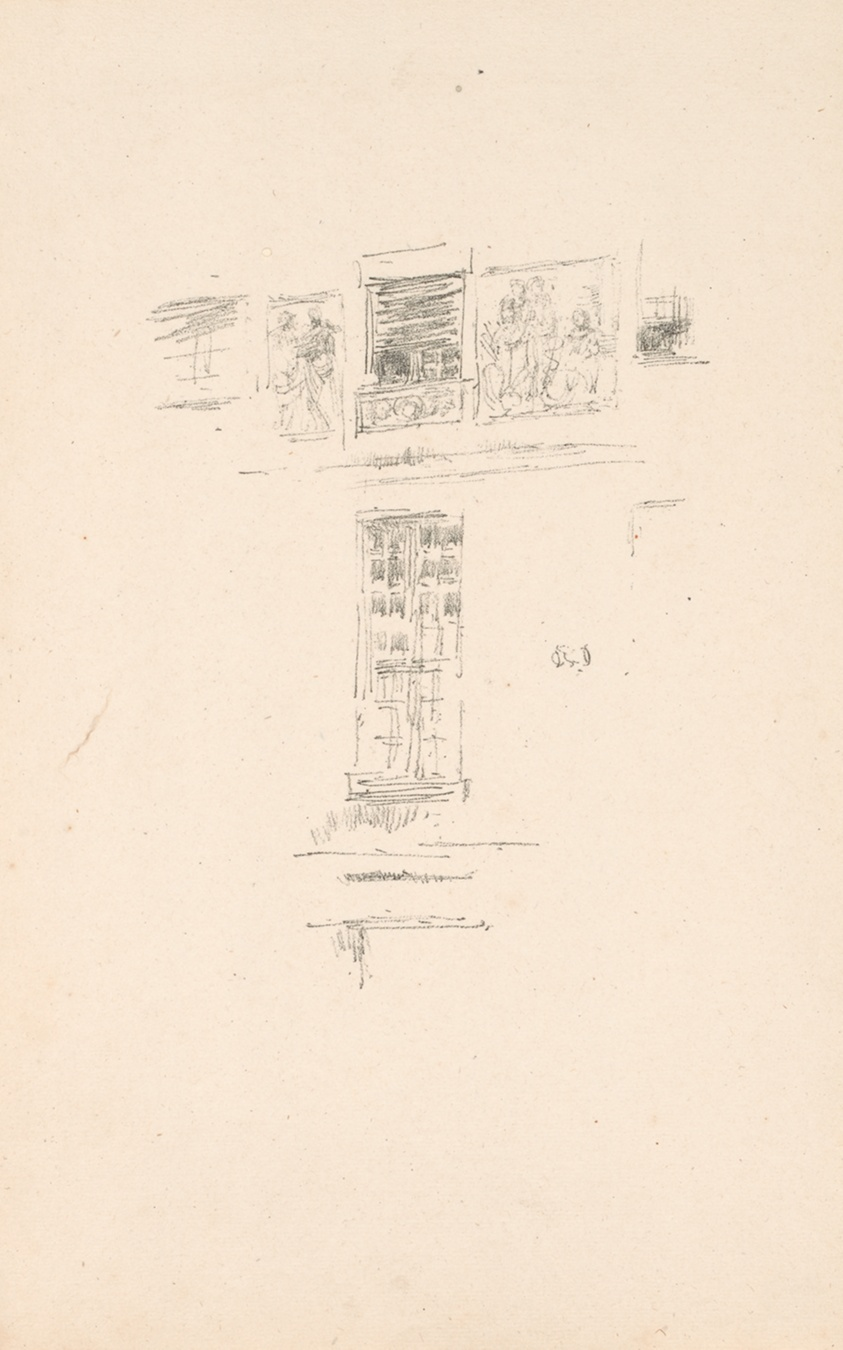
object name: Print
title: Hôtel Colbert, Windows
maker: James McNeill Whistler (American, 1834-1903)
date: 1891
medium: Transfer lithograph in black ink on ivory laid paper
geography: United States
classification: transfer lithograph; lithograph; print; prints and drawing; paper